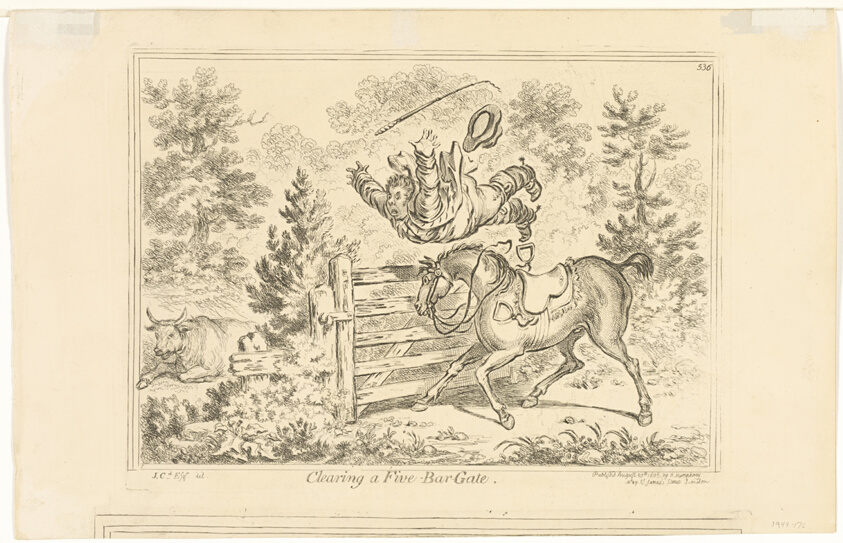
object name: Print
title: Harmony Before Matrimony (recto); Clearing the Five Bar Gate (verso)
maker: James Gillray (English, 1756-1815); published by Hannah Humphrey (English, c. 1745-1818)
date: published October 25, 1805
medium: Hand-colored etching on paper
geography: England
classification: etching; print; prints and drawing